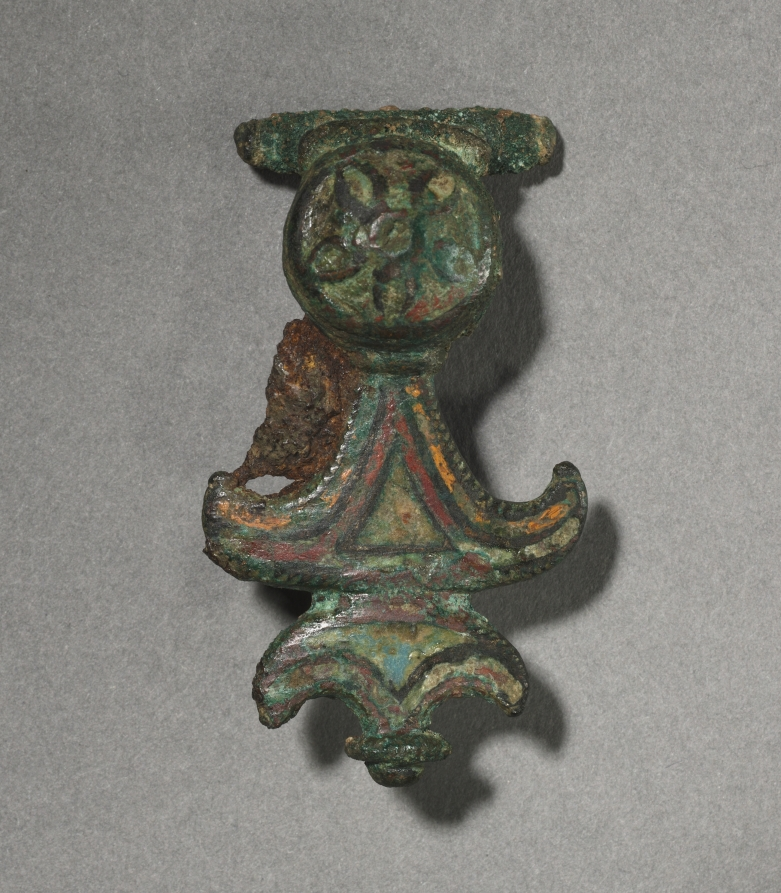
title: Ornamental Brooch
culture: Gallo-Roman or Romano-British, Migration period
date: c. 100–300 CE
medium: bronze and champlevé enamel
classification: Jewelry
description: These brooches functioned as garment clasps (much like the generally larger fibulae) and are distinctive for their decorative enamels. The art of enameling was highly popular among the conquered peoples who lived on the outskirts of the Roman empire, chiefly the Celts and the Gauls. Though the enameling technique was practiced by the Romans themselves on small objects, the brightly colored decoration readily appealed to "barbarian" taste. By the AD 200s, enameled brooches like these were being made in abundance by the native peoples of Britain and Gaul (modern France and Belgium).